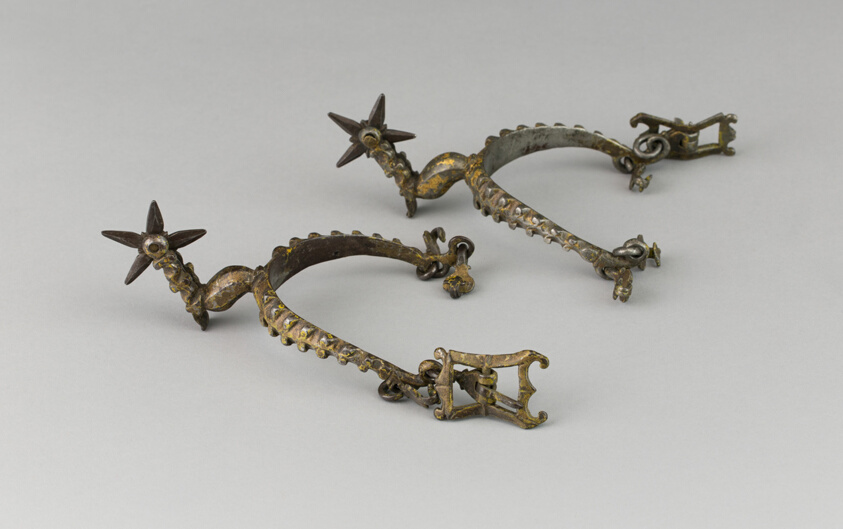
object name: Armor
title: Pair of Spurs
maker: European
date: c. 1630/35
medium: Steel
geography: Europe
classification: horse equipment; armor; arms and armor